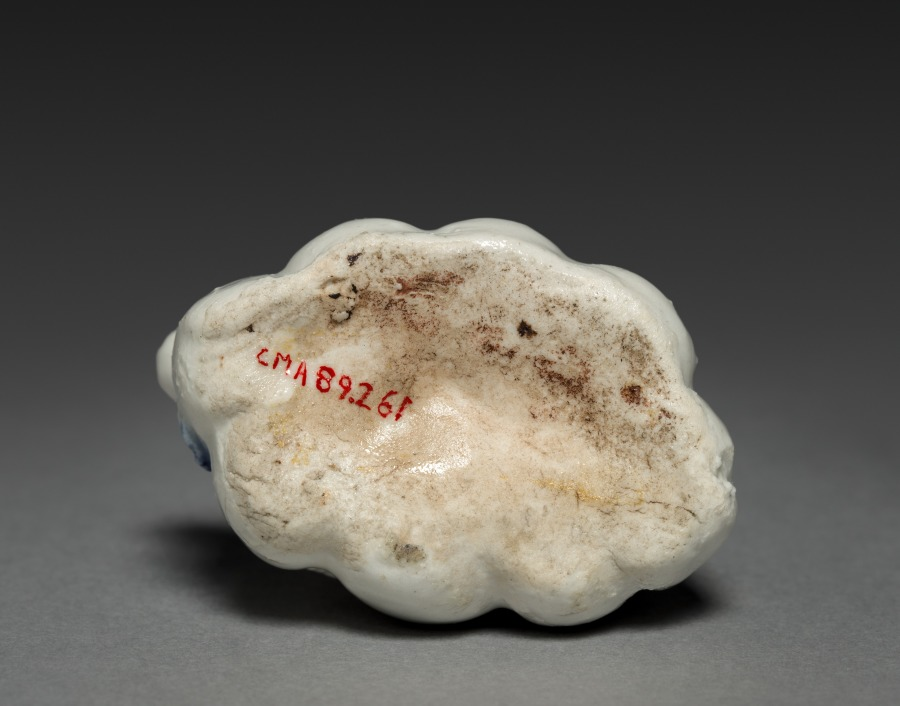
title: Waterdropper in Shape of Chinese Boy Seated on a Gourd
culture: Japan, Edo period (1615–1868)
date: 1700s to mid-1800s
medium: porcelain, molded and carved, with underglaze blue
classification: Ceramic